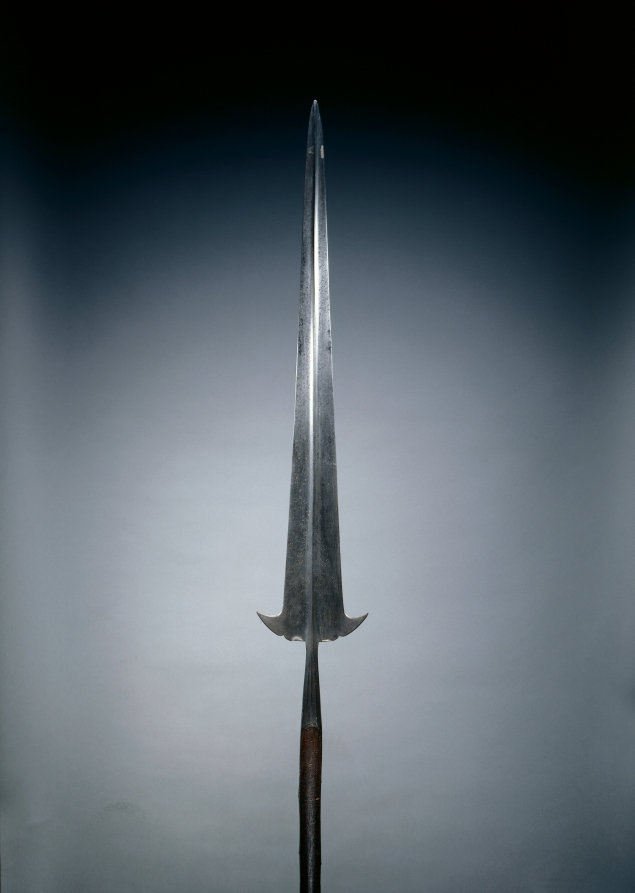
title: Partisan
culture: Italy, 16th century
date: c. 1550–1600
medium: steel, etched; oval wood haft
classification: Arms and Armor